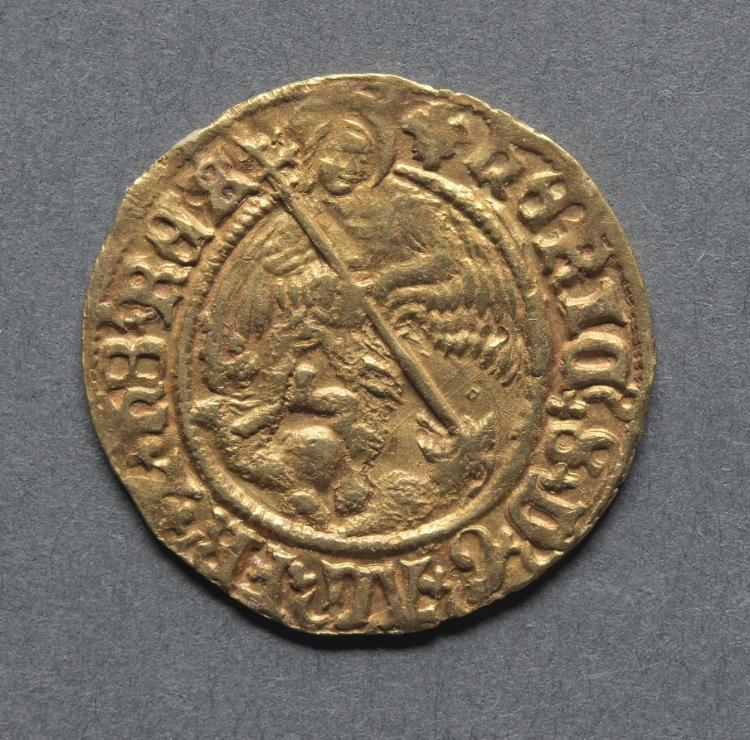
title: Half Angel: Angel Slaying a Dragon (obverse)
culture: England, Henry VIII, 1509-1547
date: 1526–1544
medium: gold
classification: Coins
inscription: HENRIC 8 DG AGL FR Z HIB REX